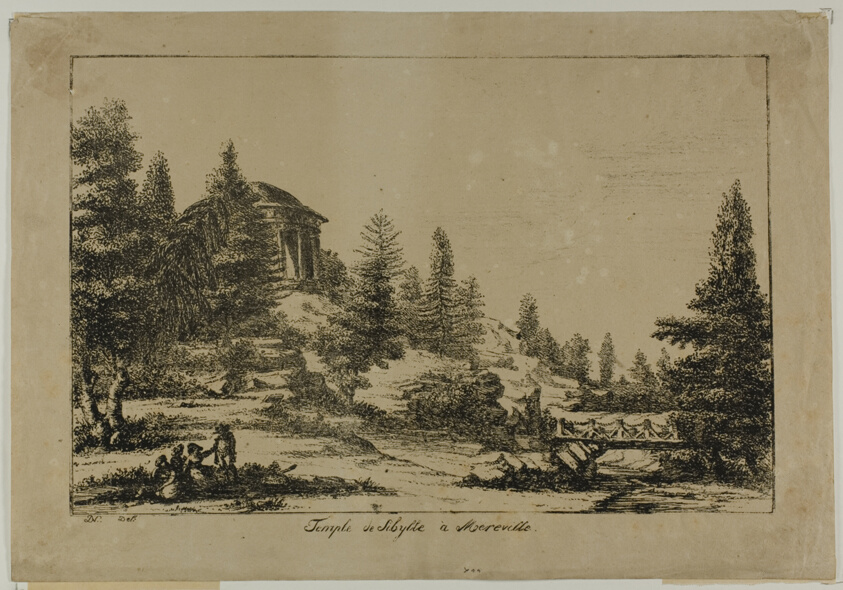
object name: Print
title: Temple of Sibyl in Méréville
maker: Dominique-Vivant Denon (French, 1747-1825)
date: 1817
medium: Lithograph in black on tan wove paper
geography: France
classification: lithograph; print; prints and drawing